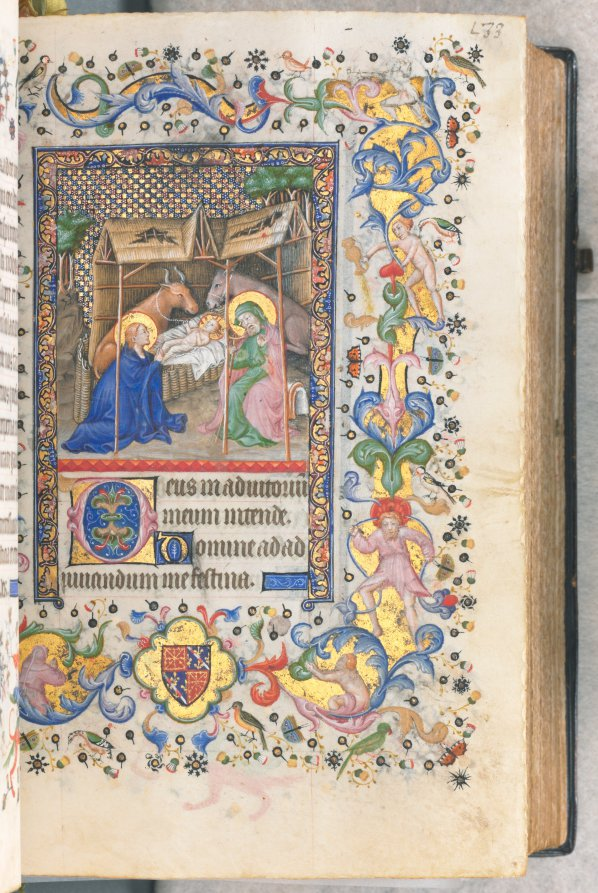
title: Hours of Charles the Noble, King of Navarre (1361-1425): fol. 67r, Nativity (Prime)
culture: France, Paris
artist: Master of the Brussels Initials and Associates (French)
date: c. 1405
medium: ink, tempera, and gold on vellum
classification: Bound Volume